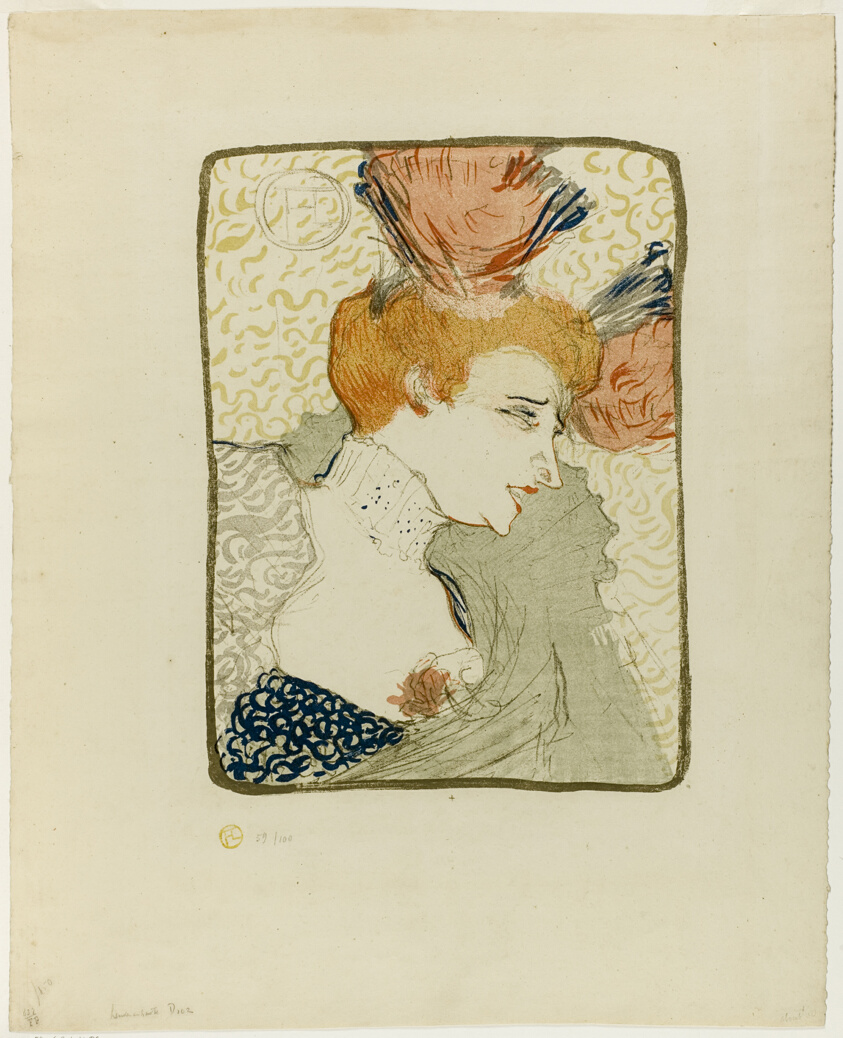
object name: Print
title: Bust of Mademoiselle Marcelle Lender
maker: Henri de Toulouse-Lautrec (French, 1864-1901)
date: 1895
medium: Color lithograph on cream wove paper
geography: France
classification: lithograph; print; prints and drawing